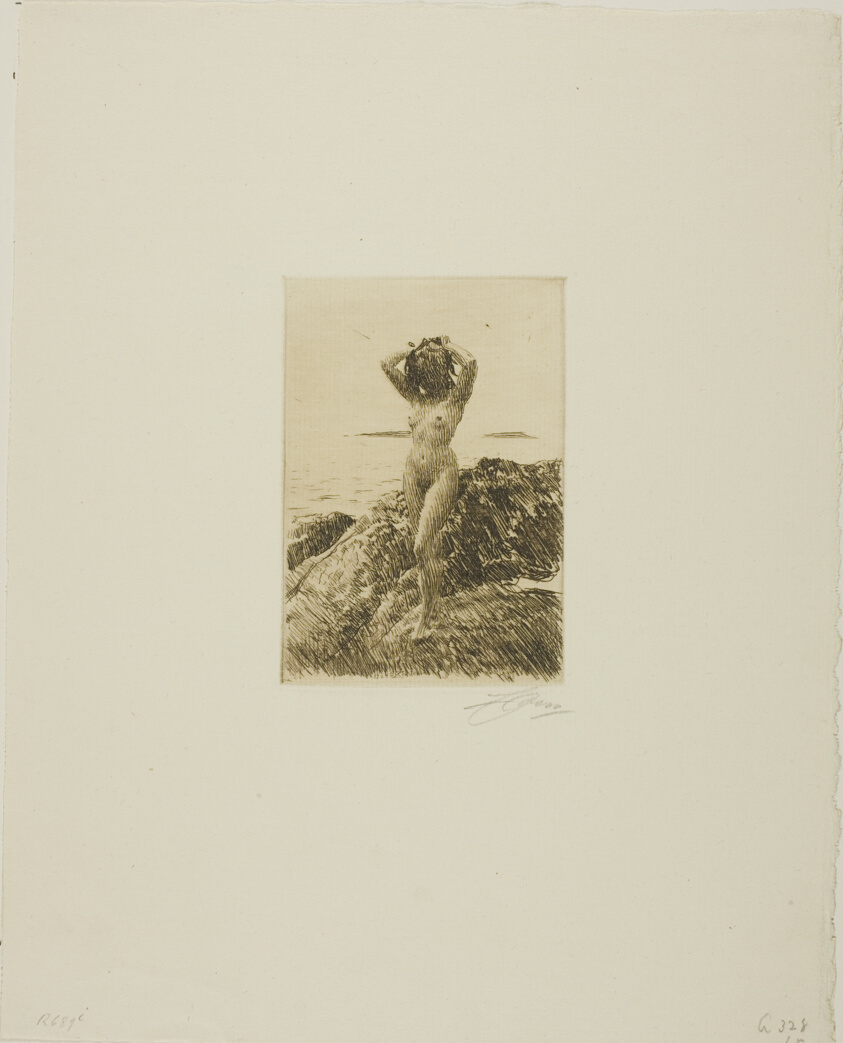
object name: Print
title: Hårtång (Seawood-wreath)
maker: Anders Zorn (Swedish, 1860-1920)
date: 1914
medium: Etching on ivory laid paper.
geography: Sweden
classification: etching; print; prints and drawing